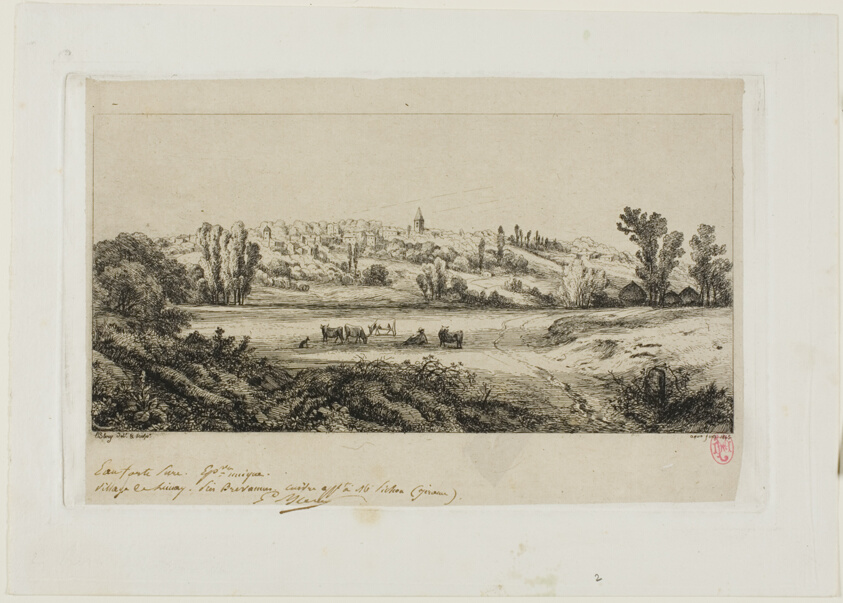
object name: Print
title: View of the Village of Limay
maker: Eugène Blery (French, 1805-1887)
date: 1845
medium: Etching on ivory China paper collée laid down on white wove paper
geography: France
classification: etching; print; prints and drawing